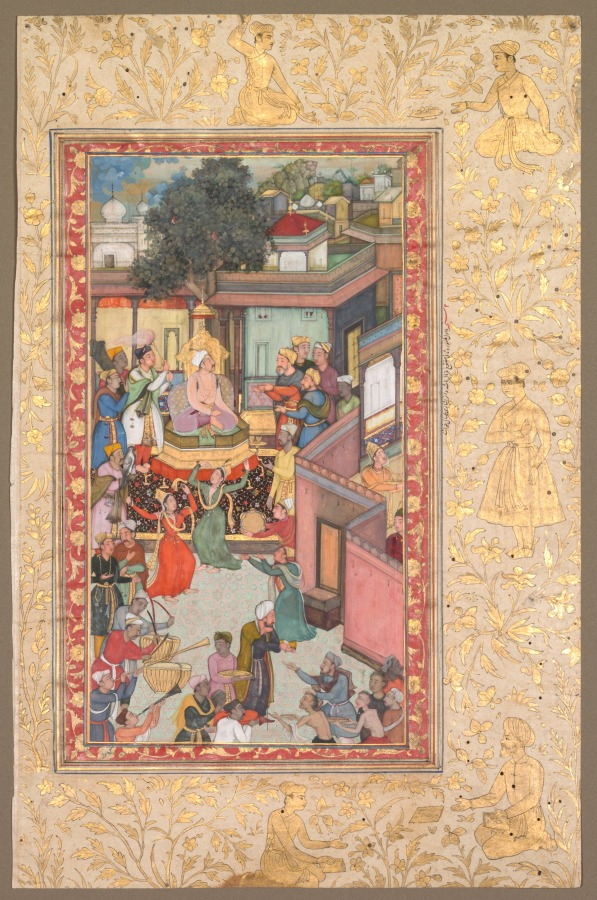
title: Circumcision ceremony for Akbar’s sons, painting 126 from an Akbar-nama (Book of Akbar) of Abu’l Fazl (Indian, 1551–1602)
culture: Mughal India, court of Akbar (reigned 1556–1605)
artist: attributed to Dharam Das (Indian, active c. 1580–1605)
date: c. 1602–3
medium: gum tempera, ink, and gold on paper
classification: Painting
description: This page is from a copy of the biography of Akbar that was completed not long before his death in 1605. It depicts him much younger, during the festivities held on October 22, 1573, in his newly built capital city of Fatehpur Sikri, near Agra, on the occasion of the circumcision ceremony for his three young sons. Dancers in Chaghatai Turkish dress perform as Akbar’s weight in gold is being distributed to the poor. Akbar wears a simple white tunic, or jama, stained at the armpits by aromatic musk. A curved dagger in a red velvet sheath is tucked into his golden sash, and he is crowned with a white crested turban.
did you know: An attendant strokes Akbar’s hunting falcon, perched on a glove.